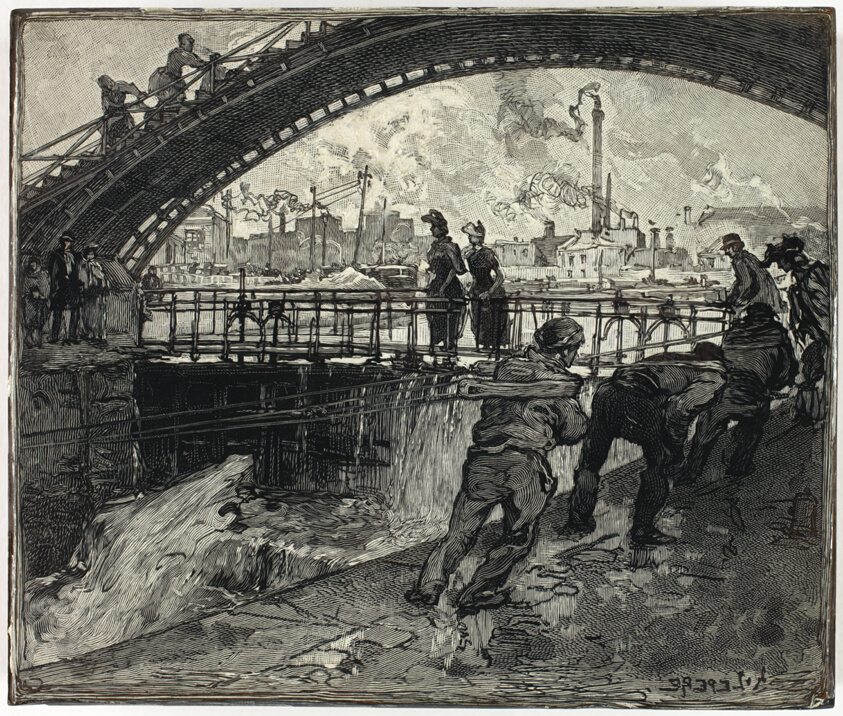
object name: Print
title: Woodblock for Lock of the Canal Saint-Martin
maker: Louis Auguste Lepère (French, 1849-1918)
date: 1890, published 1910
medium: Wood engraving block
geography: France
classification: wood engraving block; matrix; prints and drawing; print